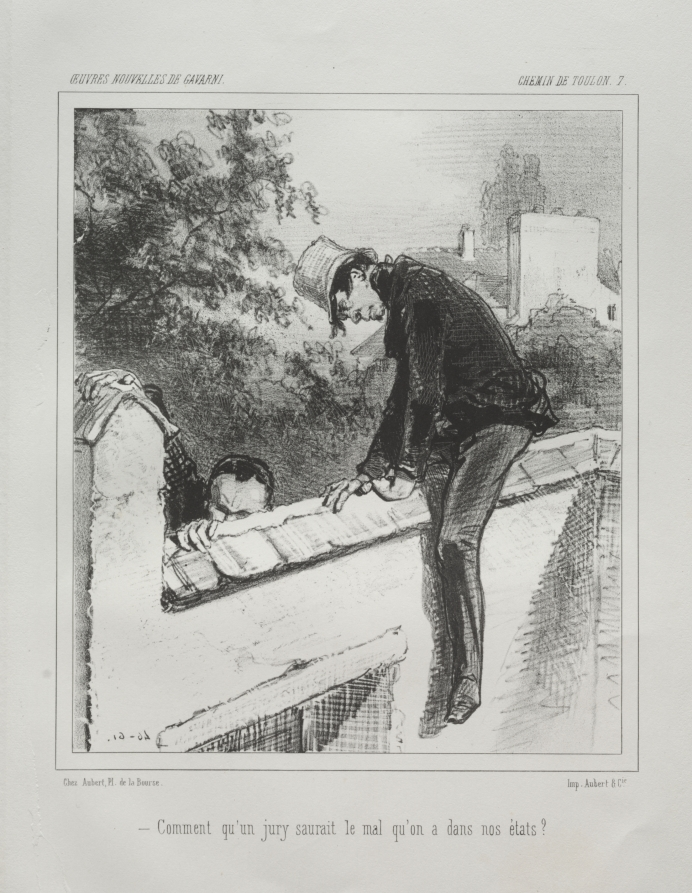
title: Chemin de Toulon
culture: France, 19th century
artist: Paul Gavarni (French, 1804–1866)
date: c. 1846–47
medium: lithograph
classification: Print